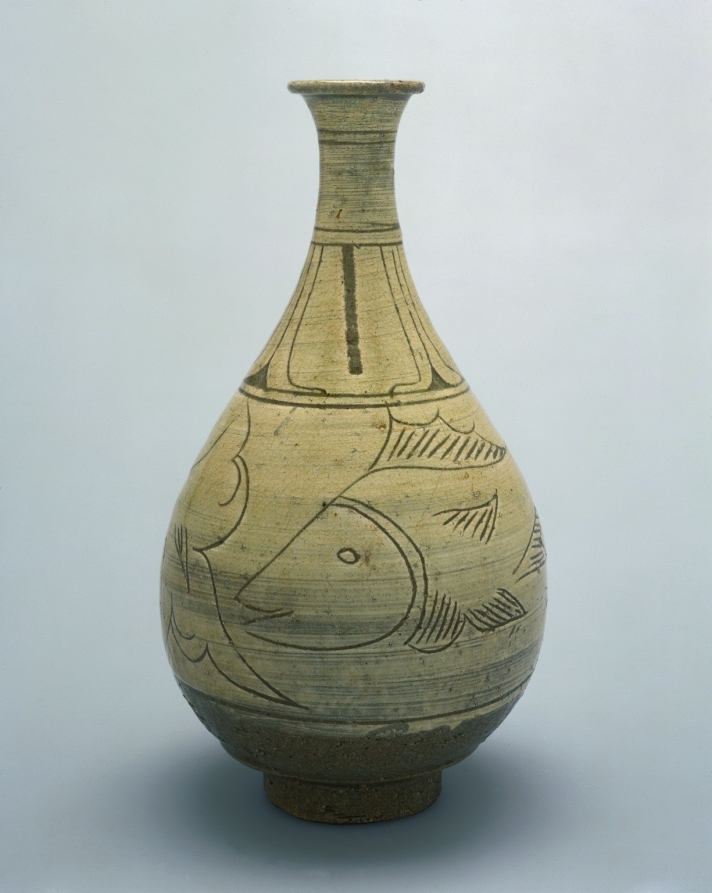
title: Bottle with Incised and Sgraffito Fish Design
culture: Korea, Joseon dynasty (1392–1910)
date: 1400s–1500s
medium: stoneware with incised design (Buncheong ware)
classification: Ceramic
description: This whimsical bottle is classified as Buncheong 분청 (literally, powdered green). Flourishing during the 1400s–1500s, Buncheong indicates pottery with iron-rich clay decorated with white slip. After firing, the color of the clay body usually became greenish-gray due to its high iron content. Korean artists tried to emulate the white porcelain wares of the Chinese Ming period, although the result was not the same. On the surface coated with white slip, the image of a smiling fish is carved in bold lines, a technique distinctive to Jeolla province, a southwest region of the Korean peninsula.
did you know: The fish depicted here seems to be a small yellow croaker, abundant off the southwest coast of the Korean peninsula.